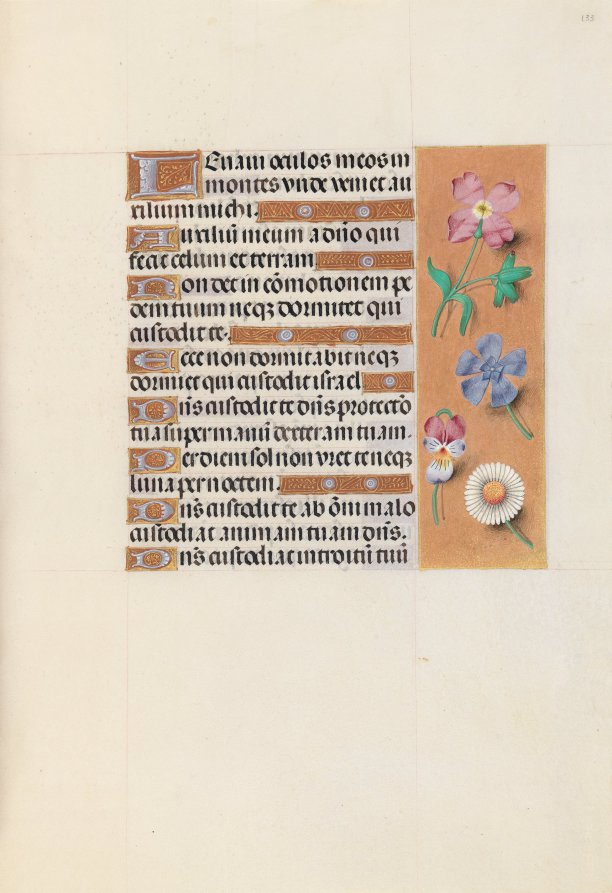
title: Hours of Queen Isabella the Catholic, Queen of Spain: Fol. 133r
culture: Flanders, Ghent and Bruges, late 15th century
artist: Master of the First Prayerbook of Maximillian (Flemish, c. 1444–1519)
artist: and Associates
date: c. 1500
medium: ink, tempera, and gold on vellum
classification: Bound Volume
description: This manuscript was illuminated by a circle of at least five highly organized manuscript painters active in the Flemish cities of Ghent and Bruges. The principal illuminator was Alexander Bening, who painted the majority of the book's miniatures. Manuscripts produced by this circle of artists are renowned for the decoration of their borders, which typically feature a rich variety of realistically-painted flowers, birds, and butterflies. This prayer book, called a book of hours, was intended not for a cleric, but for the private devotions of a lay person-in this case, Isabella the Catholic, Queen of Spain (1451-1504). Isabella's coat of arms embellishes the book's frontispiece. It is unlikely that the book was commissioned by the Queen herself; rather, she probably received it as a diplomatic gift from someone courting her patronage, perhaps Cardinal Francisco Jimenez de Cisneros. A Franciscan friar, Jimenez was dependent upon Isabella for his advancement, first to the post of Queen's confessor in 1492, and then to Archbishop of Toledo in 1495.